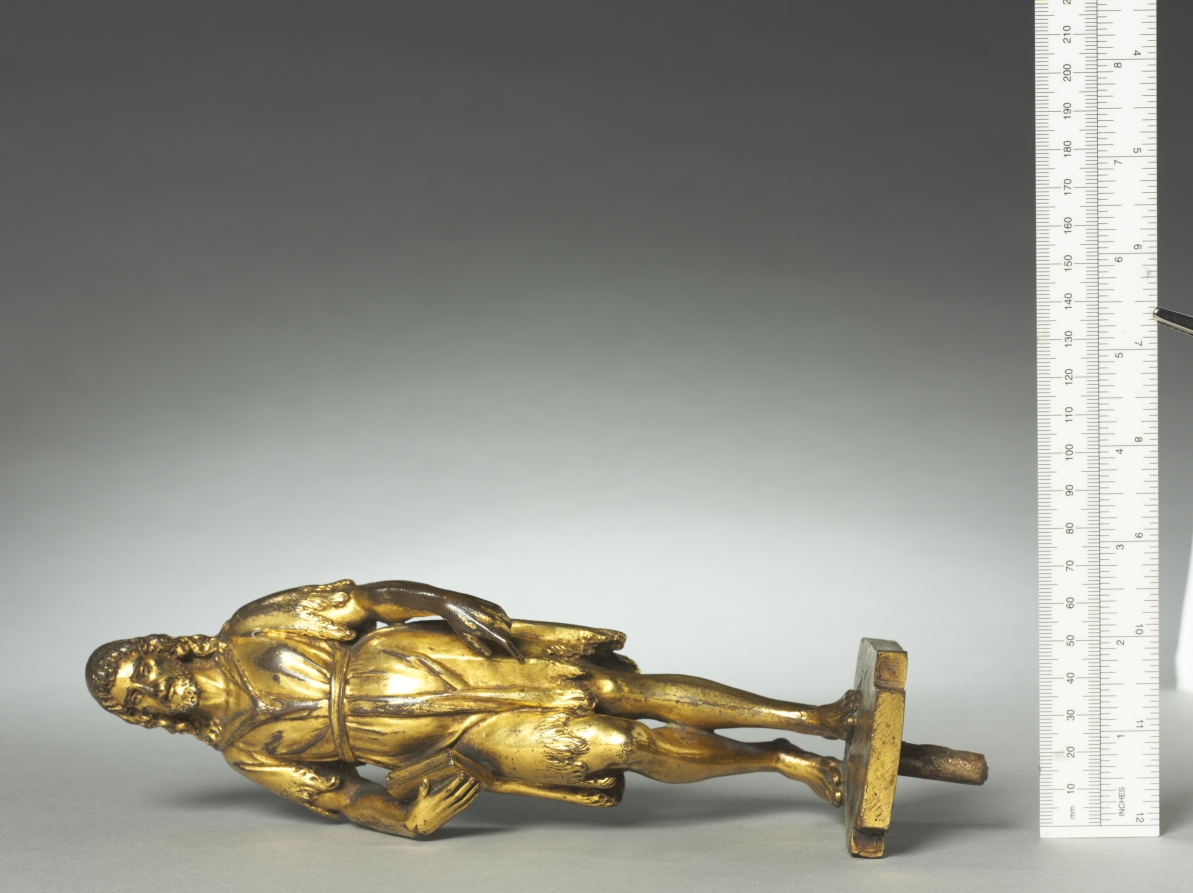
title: Saint John the Baptist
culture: Italy, Venice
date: c. 1550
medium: gilt bronze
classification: Sculpture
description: This small bronze, covered with gold, was produced in multiple versions. Saint John stands here, looking calm and composed, in a rather graceful pose. This piece has a sense of forward motion even though the figure appears to be leaning back in this stance. Elegant and subtle, this piece is a beautiful example of small cast Renaissance bronzes.